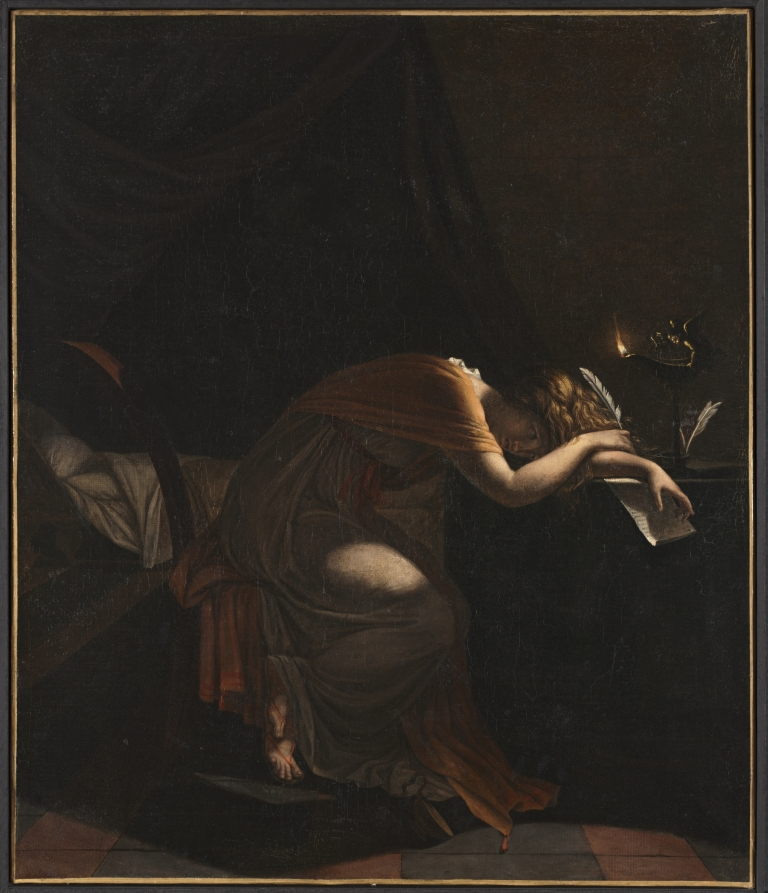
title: The Death of Sophonisba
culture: France, 19th century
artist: attributed to Pierre Guérin (French, 1774–1833)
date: c. 1810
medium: oil on canvas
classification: Painting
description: When a Roman general seized Sophonisba as war booty, her husband encouraged her to die with dignity rather than become a captive. She chose suicide by poison. As depicted in the painting, the toxin has just begun to take effect, and she uneasily maintains composure while penning a suicide note.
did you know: The story of Sophonisba has been an inspiration to artists, writers, and even filmmakers since the 1300s.